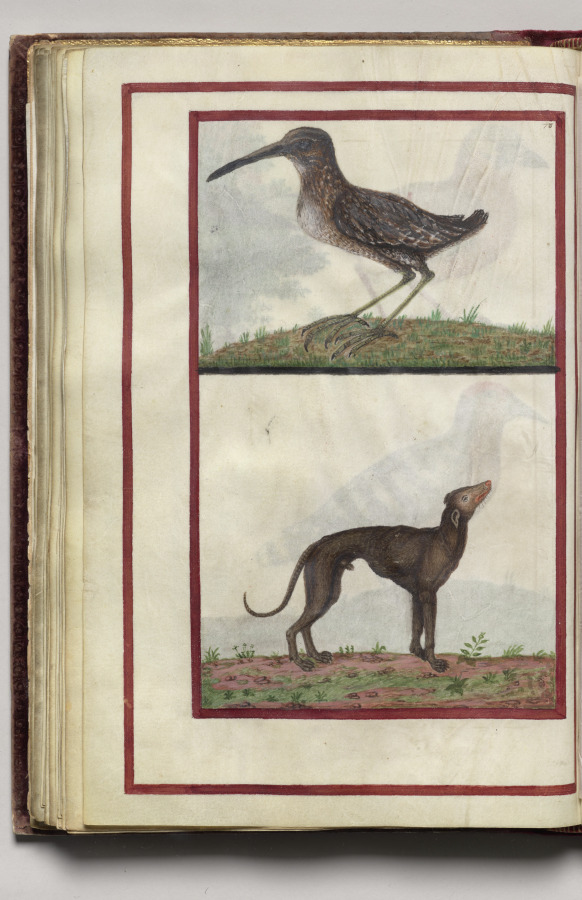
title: Bird and Dog, folio 37 (verso), from Florilegium (A Book of Flower Studies)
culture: France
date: 1608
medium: watercolor, ink, silver and gold over occasional traces of pencil, on vellum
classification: Bound Volume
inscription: Dated: Poitiers 1608 (on frontispiece) Signed: On frontispiece in black ink, lower right: Van Kuyk Notation on drawing: Frontispiece: in pencil, lower margin: * élève de Van Kessel, peintre flammand (* in pencil also appears in front of Van Kuyk's name).